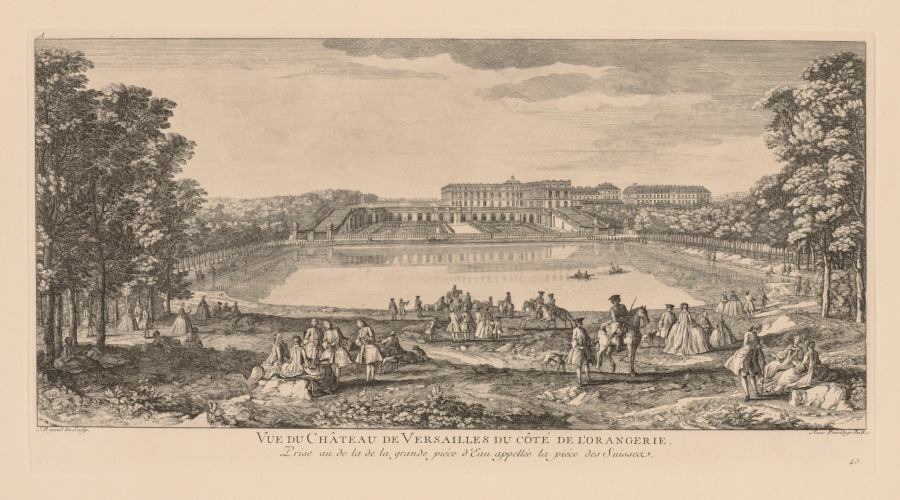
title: Vue du Château du Versailles, du côté de l'Orangerie, prise au delà de la pièce d'eau des Suisses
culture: France, 18th century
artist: Jacques Rigaud (French, 1681–1754)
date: 1730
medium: engraving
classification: Print